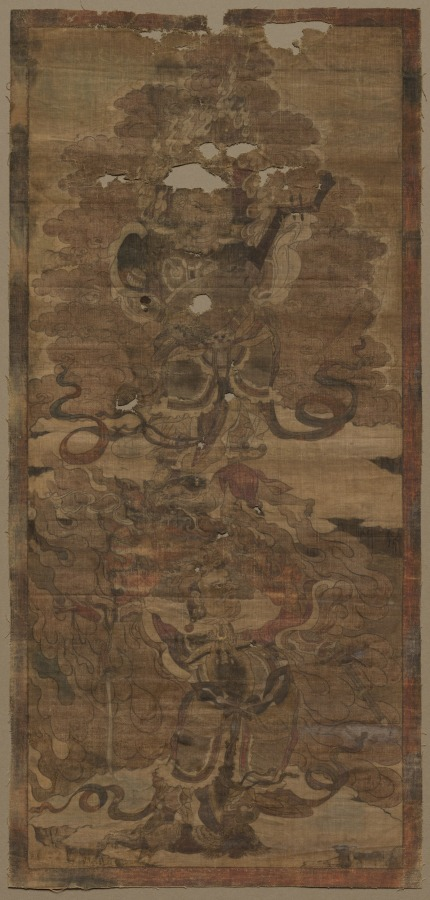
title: Guardian Kings: Dhrtarastra and Virupaksa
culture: Sino-Tibet, Yuan dynasty (1271-1368)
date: 1st half of 1300s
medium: Thangka, ink and color on cotton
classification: Painting